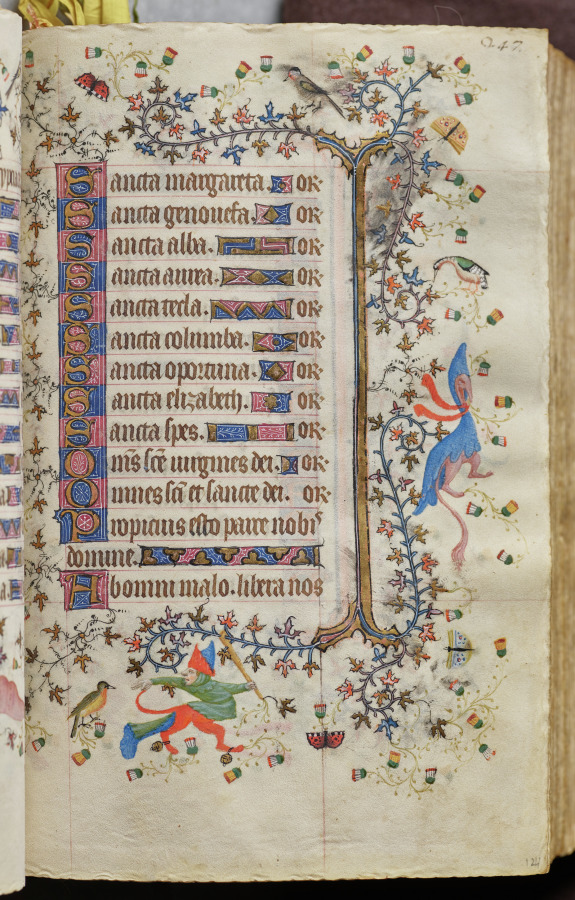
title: Hours of Charles the Noble, King of Navarre (1361-1425): fol. 124r, Text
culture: France, Paris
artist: Master of the Brussels Initials and Associates (French)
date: c. 1405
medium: ink, tempera, and gold on vellum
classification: Bound Volume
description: This precious volume was obviously highly prized by its owner, the French-born King of Navarre, who had his coat of arms painted on no less than twenty folios. Rather than directly commissioning this manuscript from a specific workshop, it seems that Charles the Noble acquired his book of hours -- perhaps ready-made for the luxury market -- while on a trip to Paris in 1404-05. A collaborative effort, six painting styles are evidenced within the pages of this codex, those of two Italians, two Frenchmen, and two Netherlanders. The painter who was responsible for the planning and decoration of the book, and who produced seventeen of the large miniatures, was a Bolognese artist known as the Master of the Brussels Initials. His principal assistant, responsible for most of the borders, was a Florentine who signed his name "Zecho" da Firenze on folio 208 verso.